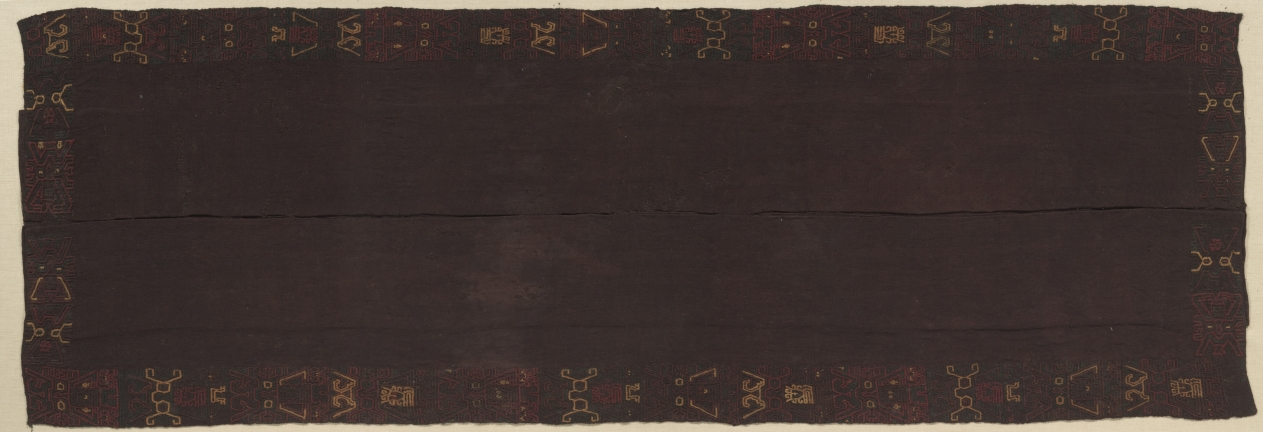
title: Mantle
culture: Peru, South Coast, Paracas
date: c. 600–400 BCE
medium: embroidery on wool ground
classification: Textile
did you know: Extremely dry conditions on Peru's desert coast allow for the extraordinary preservation of textiles.